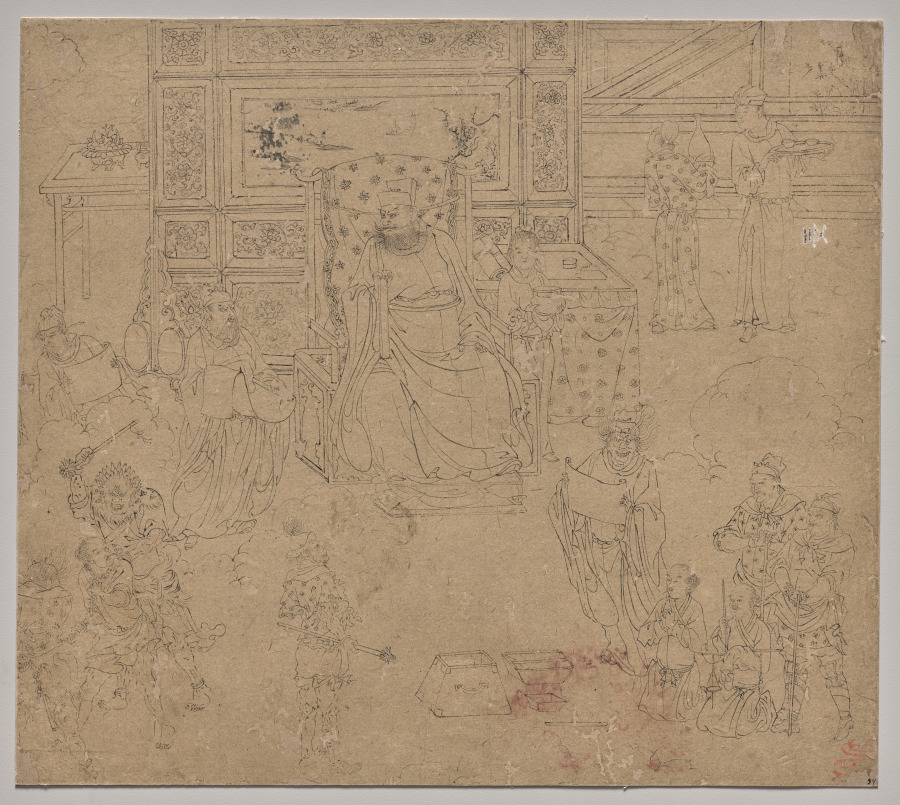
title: Album of Daoist and Buddhist Themes: Kings of Hells: Leaf 34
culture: China, Southern Song dynasty (1127-1279)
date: 1200s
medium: Album, ink on paper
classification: Painting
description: This extraordinary album has 50 paintings on a variety of religious subjects. They were likely created by several master craftsmen to share with studio apprentices as models for fulfilling commissions. The Jade Emperor and the Daoist pantheon make up the first 26 leaves. The next 14 leaves portray the Buddhist Ten Kings of Hell administering punishments to the dead. The third section, called “Clearing the Mountains,” features divine soldiers, led presumably by the deity Erlang Shen 二郎神, fighting undesirable creatures.